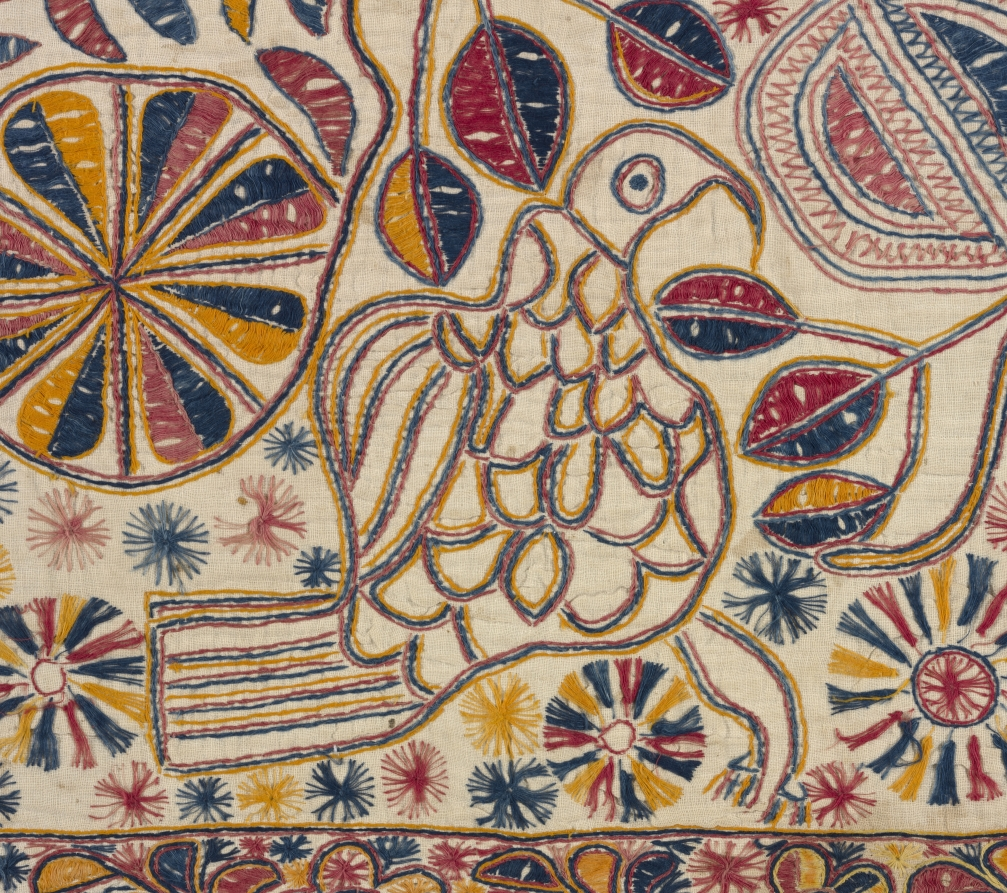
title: Kantha (Ceremonial Quilt)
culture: India, East Bengal, 19th century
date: 1800s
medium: embroidery: cotton thread on cotton tabby ground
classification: Embroidery